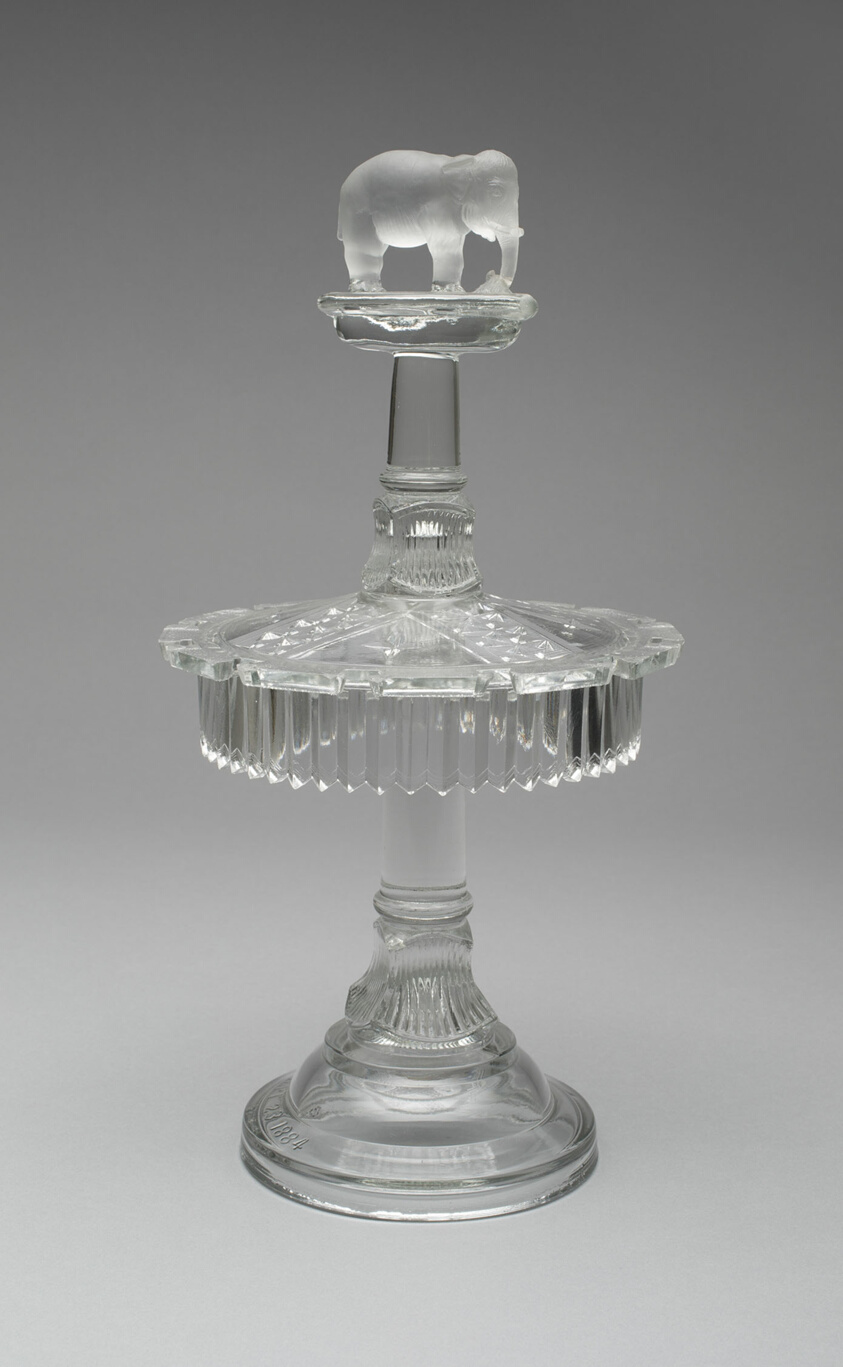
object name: Glass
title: "Jumbo"/Elephant pattern spoon rack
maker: Attributed to Canton Glass Company; Canton, Ohio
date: 1883–5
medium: Glass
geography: Canton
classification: spoon stand; glass; american decorative arts; american arts; decorative arts